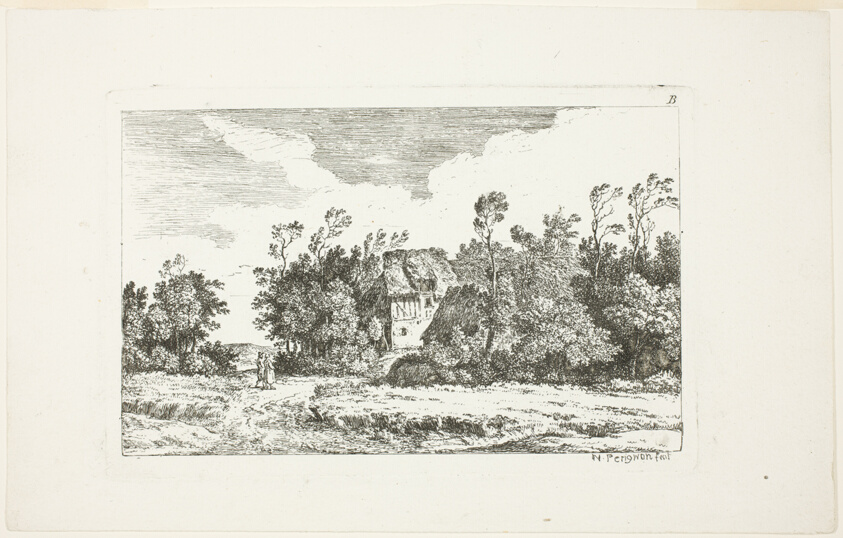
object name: Print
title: Landscape, from Deuxieme Cahier de Paysage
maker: Nicolas Pérignon (French, 1726-1782)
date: 1772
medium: Etching on off-white laid paper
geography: France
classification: etching; paper; print; prints and drawing